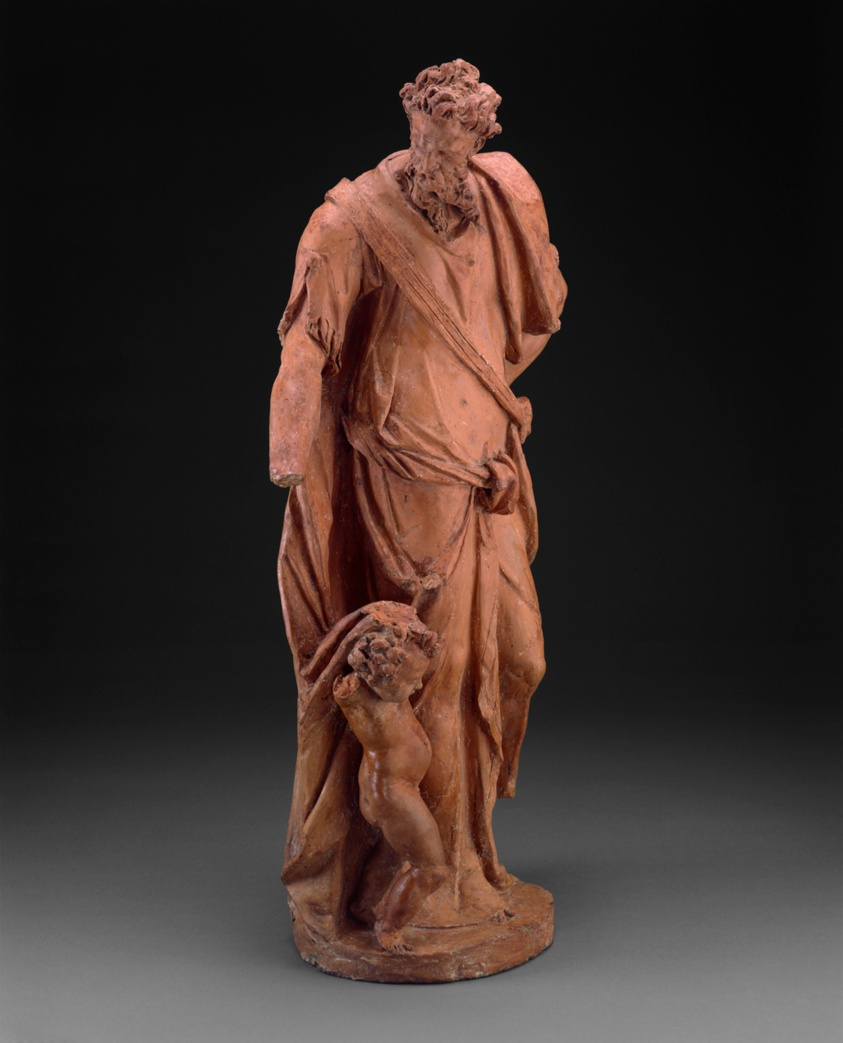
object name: Sculpture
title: One of the Set of the Four Evangelists: Matthew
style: sixteenth century, 16th Century, Renaissance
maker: Alessandro Vittoria (Italian, 1525–1608)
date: Modeled c. 1580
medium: Terracotta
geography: Venice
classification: sculpture; statuette; figure; Italian; terracotta (sculpture)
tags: religious figures, Christian subjects, Christianity, Devotion, figure, figures, man, men, religion, religious